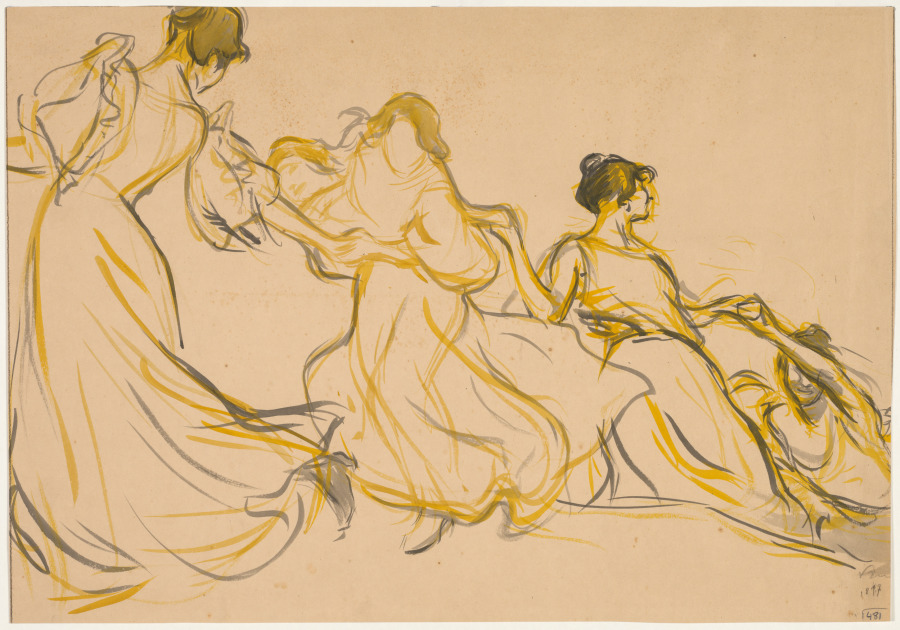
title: Study for a Decoration for the Salle des Fêtes of the Town Hall of Paris's 11th arrondissement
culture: France, 19th century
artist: Victor Emile Prouvé (French, 1858–1943)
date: 1897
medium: watercolor with black chalk framing lines on beige wove paper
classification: Drawing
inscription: Inscribed: lower right in black chalk: VP / 1897 / in graphite: 481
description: An avid draftsman, Victor Prouvé was known for his role in the École de Nancy, a group of artists active in the art nouveau movement, which integrated fine and decorative arts. This drawing relates to Prouvé's design for a mural intended to decorate the community center in the town hall of Paris's 11th arrondissement. By creating sophisticated designs for a broad public in such spaces, the artist sought to forge a role for vanguard art in everyday life.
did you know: The mural painting to which this drawing relates was one of two major designs that Victor Prouvé created for town halls throughout Paris; he also decorated the staircase of a public building in Issy-les-Moulineaux, a Paris suburb.